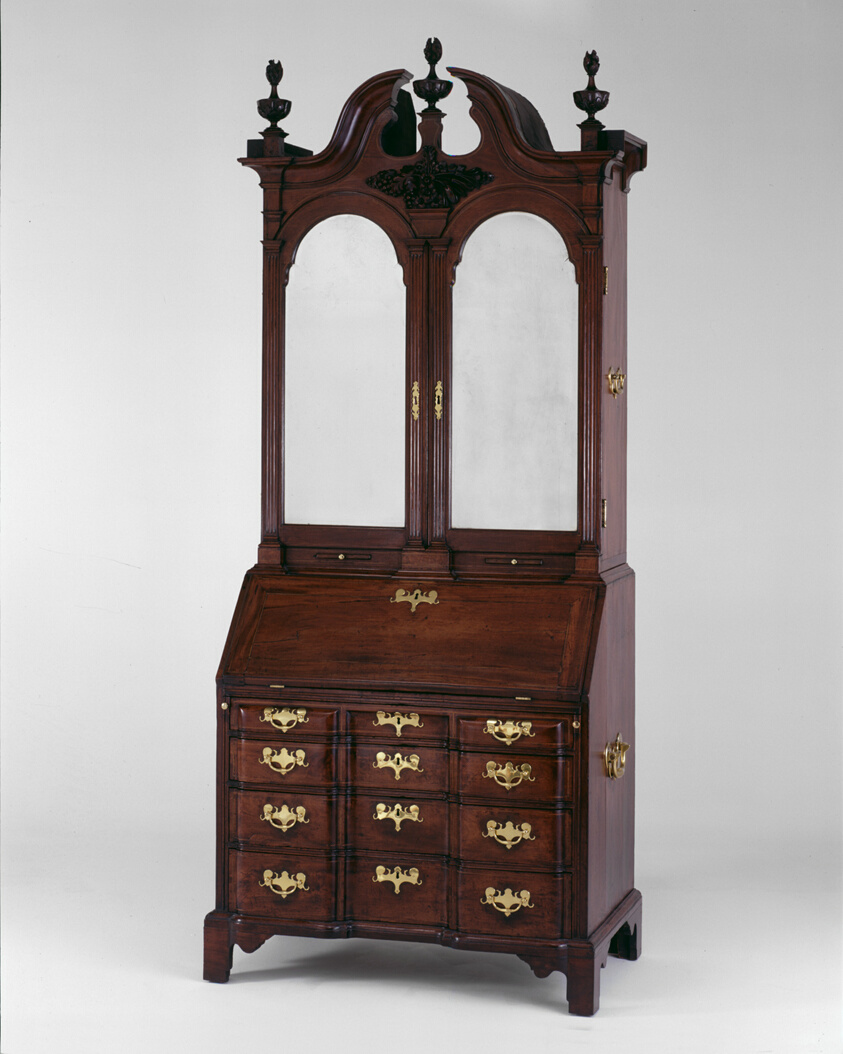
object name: Furniture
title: Desk and Bookcase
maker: Artist unknown (American, 18th century); Boston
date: 1750–70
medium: Mahogany, red oak, and white pine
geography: Boston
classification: desk; furniture; american decorative arts; american arts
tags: furniture